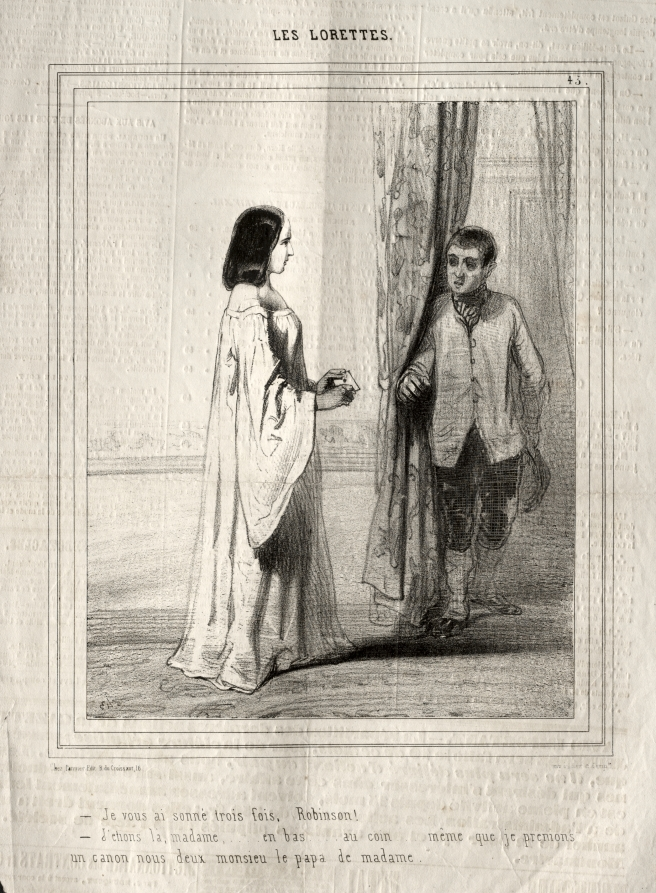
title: Les Lorettes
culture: France, 19th century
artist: Paul Gavarni (French, 1804–1866)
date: 1842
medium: lithograph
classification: Print